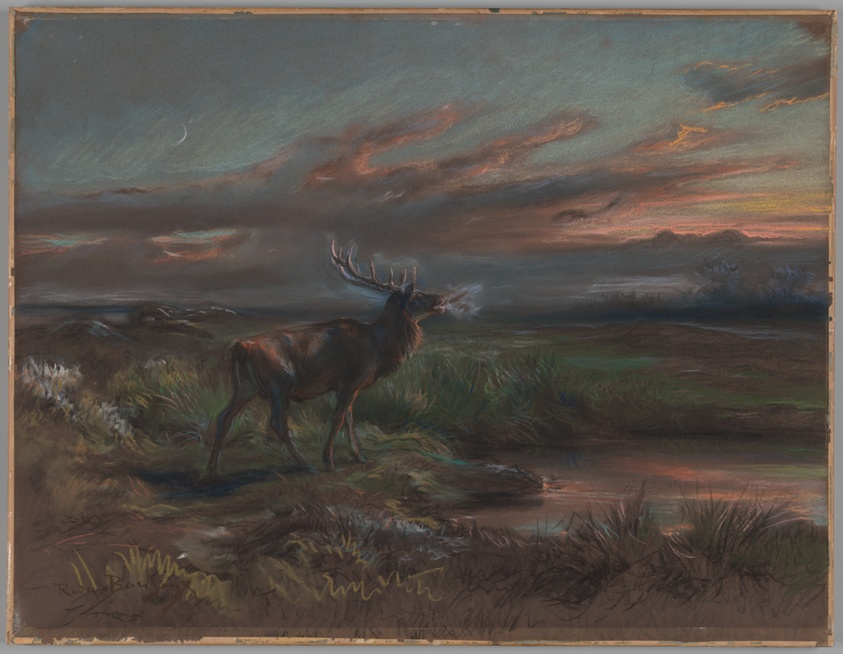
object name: Drawing and Watercolor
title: The Call of the Stag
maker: Rosa Bonheur (French, 1822-1899)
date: 1890s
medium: Pastel on brown paper, laid down on board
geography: France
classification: drawings (visual works); pastel; paper; prints and drawing